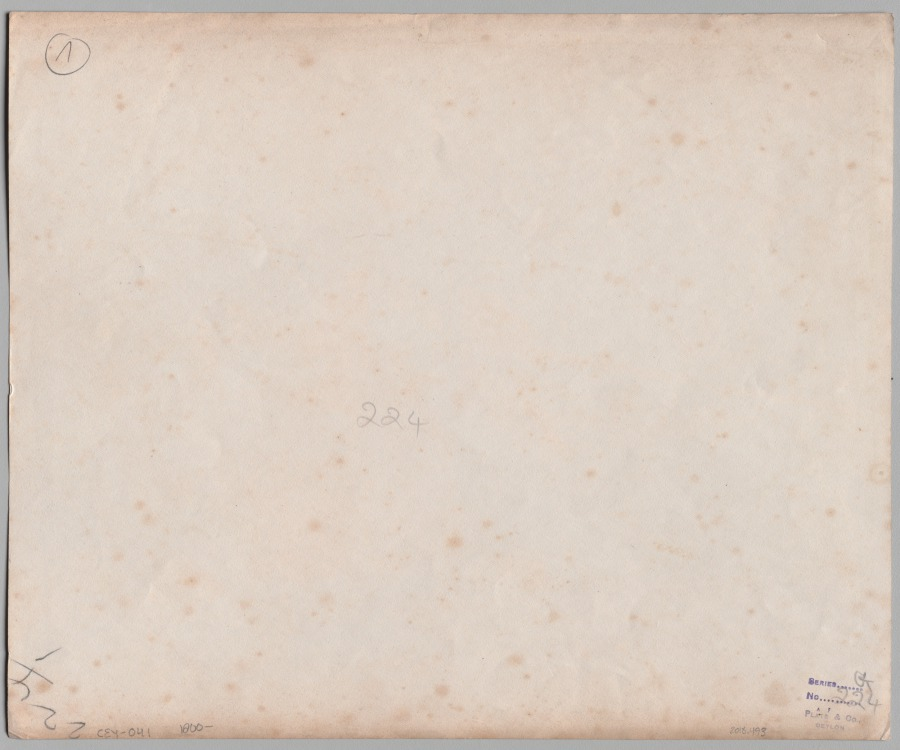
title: Monks Outside Temple, Ceylon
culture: Ceylon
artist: A. W. A. Plâté Studio (Ceylonese)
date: c. 1880s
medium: platinum print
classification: Photograph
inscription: Written in pencil on verso: "v"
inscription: Written in pencil on verso: "224"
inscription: Written in pencil on verso: "224"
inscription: Written in pencil on verso: "CEY-041 1200-"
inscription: Stamped in purple ink on verso: "Series G (written in pencil)/No 224 (written in pencil)/PLATE & CO/CEYLON"